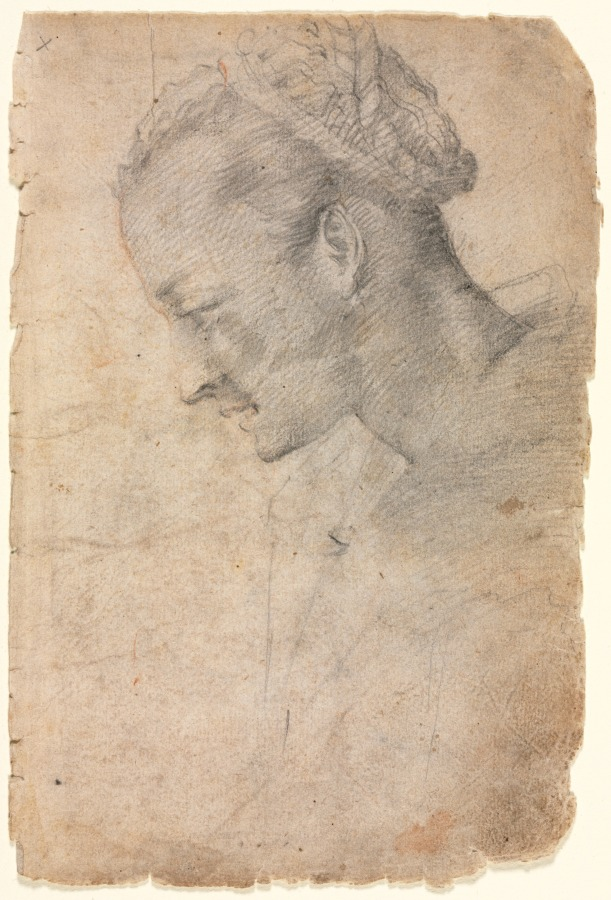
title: Profile of a Woman's Head (recto) A Kitchen Maid (verso)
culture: Italy, 16th century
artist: Alessandro Casolani (Italian, 1552/53–1607)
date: second half 1500s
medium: black chalk(?) with traces of red chalk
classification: Drawing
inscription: upper left, in graphite: x